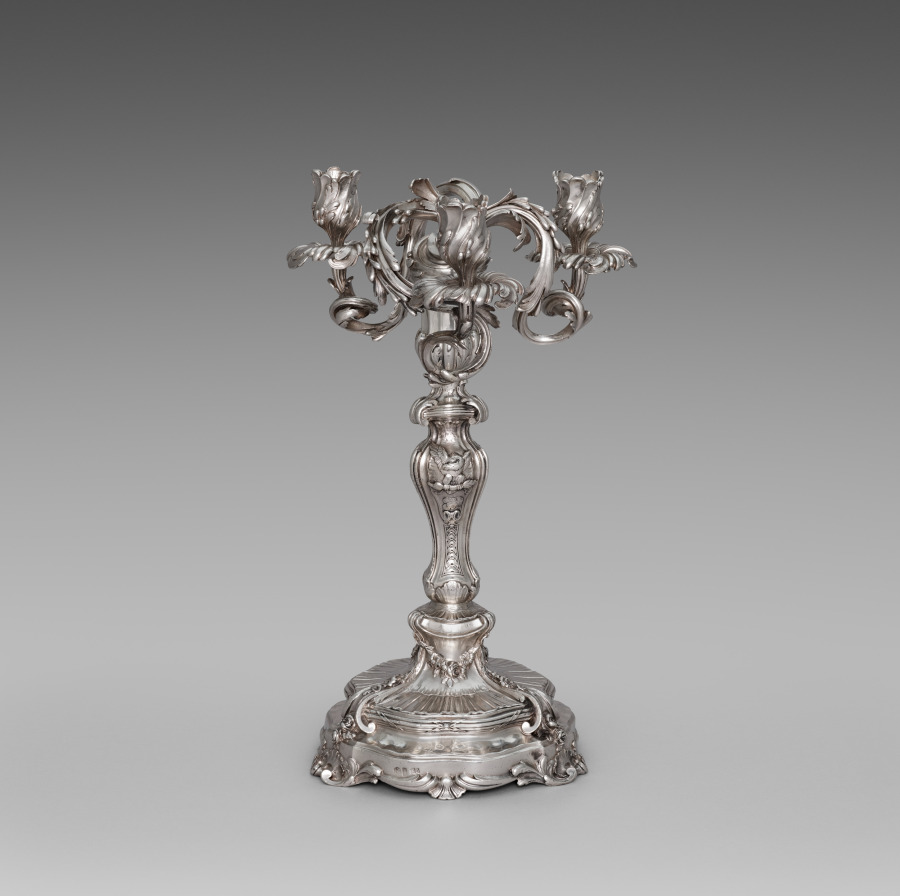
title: Candelabrum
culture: France, Paris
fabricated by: François Thomas Germain (French, 1726–1791)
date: 1757–58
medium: silver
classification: Silver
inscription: [Charge mark of Eloy Brichard , 1756−1762, beneath base]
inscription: [Warden's mark for Paris, 1757-1758, beneath base]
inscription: [Discharge mark for work intended for export, 1756−1775, on base]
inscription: [Hallmarks for Saint Petersburg, on base]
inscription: [Assayer mark of Ivan Frolov, on base]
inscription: [Russian standard of the French silver, on base]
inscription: [Maker’s mark of Francois-Thomas Germain, master silversmith on October 16, 1748, beneath drip pan one each of three bobeches]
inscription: [Charge mark Of Eloy Brichard, 1756−1762, beneath drip pan one each of three bobeches]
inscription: [Discharge mark for work intended for export, 1733 (?)−1775, beneath drip pan one each of three bobeches]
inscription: [Warden's mark for Paris, 1757−1758, beneath drip pan one each of three bobeches]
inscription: [Assayer mark of Ivan Frolov, beneath drip pan of one of three bobeches]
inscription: [Russian standard of French silver, beneath drip pan of one of three bobeches]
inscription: [Charge mark for large work of Eloy Brichard, 1756−1762, on candelabra bayonet attachment]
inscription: [Discharge mark for work intended for export, on candelabra bayonet attachment]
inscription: [Beneath base]: “Fait. Par. F. T. Germain. Sculp[teu]r. Orf[ev]re. Du Roy. Aux. Galleries. Du Louvre. A Paris. 1758”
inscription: [Beneath base]: "Du no.32"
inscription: [Beneath base]: "No 465"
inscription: [Engraved Russian Imperial coat-of-arms, beneath base]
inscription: [Modern inscription in a round paper label, beneath base]: “[?]8” [printed in black]: “3120” [written in pencil]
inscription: [Modern inscription in a rectangular paper label, beneath base]: “…IN/FRANCE” [printed in black]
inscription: [Modern inscription in a rectangular paper label, beneath base]: “46” [written in black ink]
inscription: [Engraved cipher composed with two “M”’s (?) surmounted by a royal crown, on base]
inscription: [Engraved, on base]: "No 465"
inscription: [Engraved, on base]: "du No 32"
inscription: [Engraved cipher composed with two “M”’s (?) surmounted by a royal crown, on one bobeche]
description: This candelabrum is part of a pair. Its design blurs the line between function and decoration. The arms twist and curve, appearing as flower stems while physically supporting the candles. Though this visual unity is typical of the Rococo style, the influence of the rising neoclassical style is evident in the allegorical scenes of light that decorate each candelabra’s stem.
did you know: These candelabra are part of a dinner service sent from Paris, France, to Saint Petersburg, Russia, in two separate shipments, the first of which contained 270 objects for 8 dozen place settings.